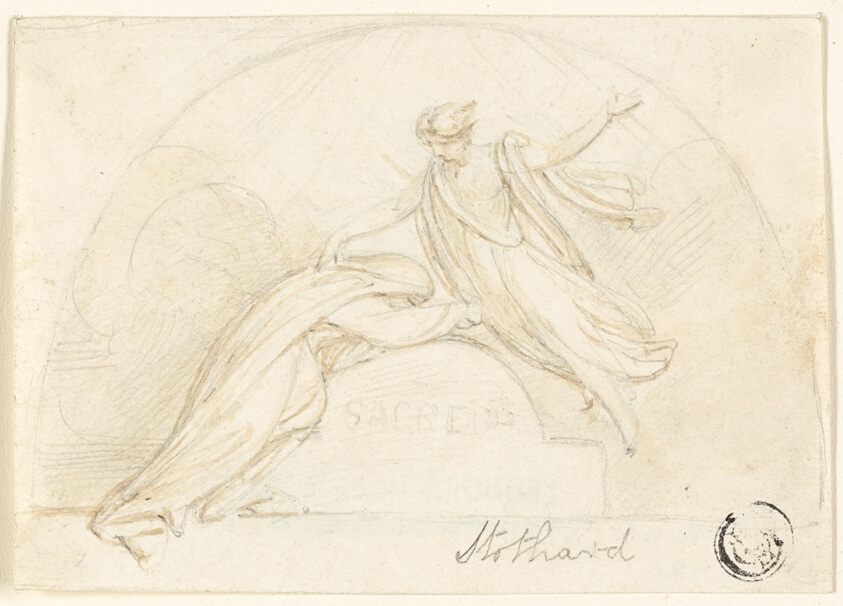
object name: Drawing and Watercolor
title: Design for Funerary Monument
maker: Attributed to John Flaxman, II; English, 1755-1826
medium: Graphite with brush and brown ink on ivory wove paper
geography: England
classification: pen and ink drawings; drawings (visual works); prints and drawing